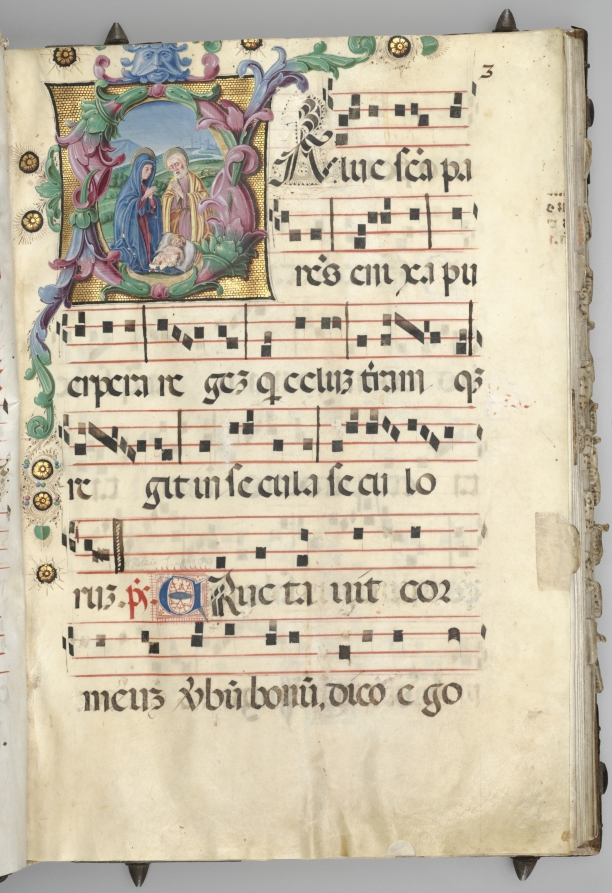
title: Gradual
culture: Italy, Verona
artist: circle of Girolamo dai Libri (Italian, 1474–1555)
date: c. 1520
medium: ink, tempera, and gold on parchment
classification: Manuscript